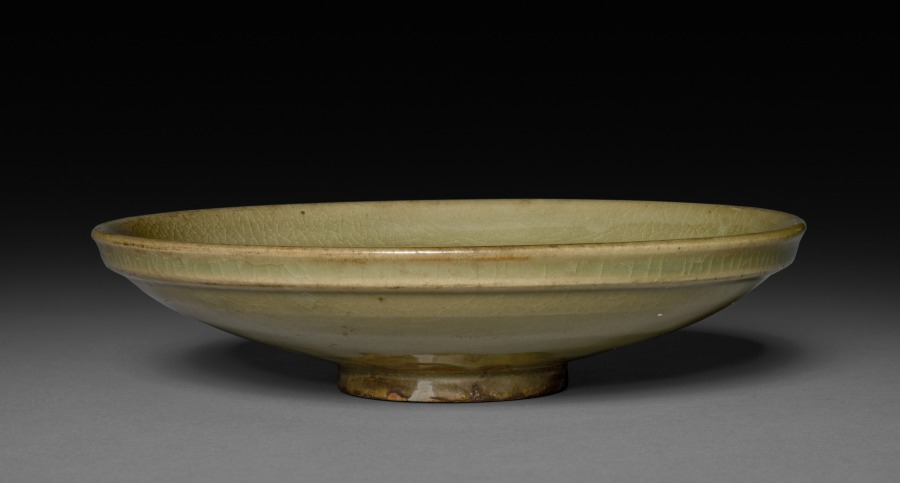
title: Saucer: Northern Celadon Ware, Yaozhou type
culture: China, late Northern Song dynasty (960-1127) - Jin dynasty (1115-1234)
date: 1100s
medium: glazed stoneware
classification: Ceramic